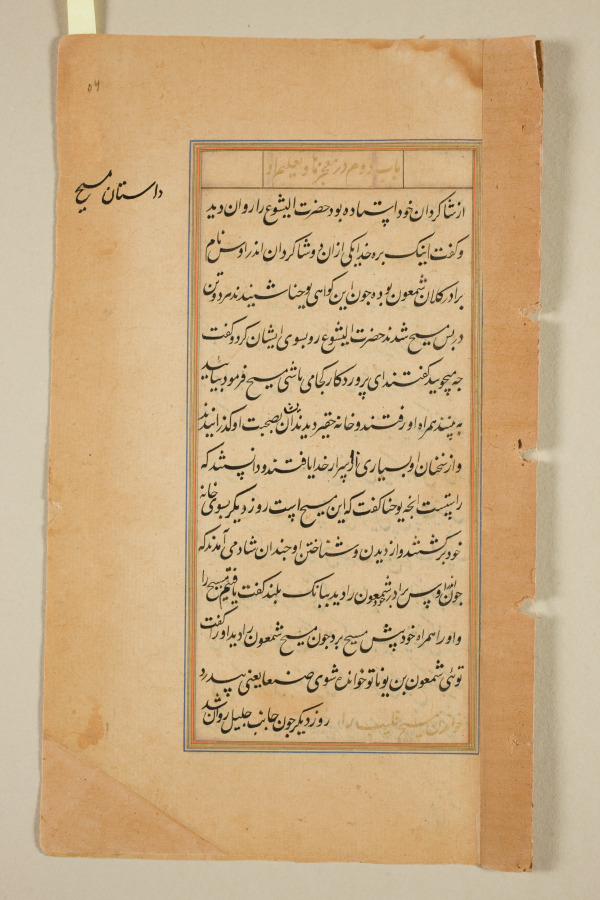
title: Text page from a Mirror of Holiness (Mir’at al-quds) of Father Jerome Xavier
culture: Mughal India, Allahabad, made for Prince Salim (1569–1627)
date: 1602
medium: Ink and gold on paper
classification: Manuscript